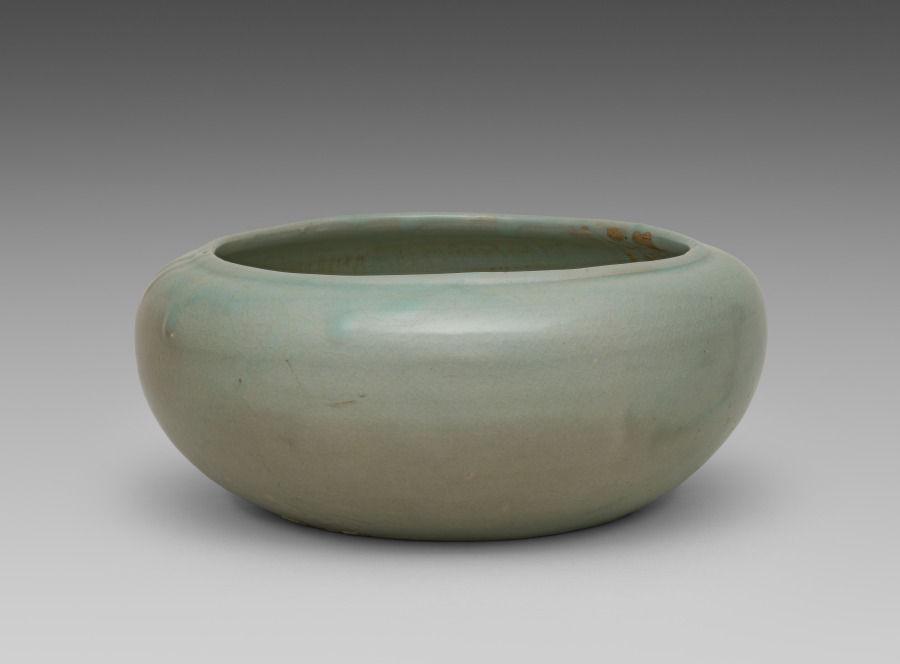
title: Bowl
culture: Korea, Goryeo dynasty (918–1392)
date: 1100s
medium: celadon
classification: Ceramic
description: As early as the seventh century, the practice of drinking tea became an important part of elite culture in Korea. In enjoying teas, elites commissioned a variety of types of utensils and vessels including this large bowl, not only to make their tea-drinking experience more exciting, but also to show their refined taste.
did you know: The distinctive bluish and greenish glaze of Goryeo celadons, shown in this bowl, is the result of distinctive small and long Korean kilns, which maintained a low oxygen saturation with a high level of carbon dioxide.